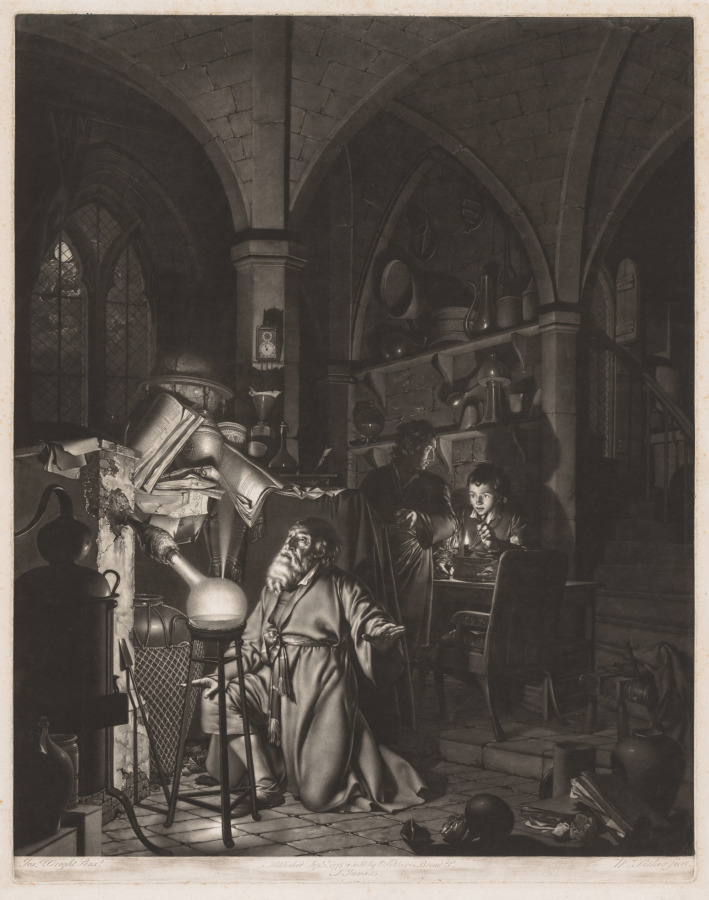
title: The Alchymist, in Search of the Philosopher's Stone, Discovers Phosphorus, and Prays for the Successful Conclusion of his Operation, as was the Custom of the Ancient Chymical Astrologers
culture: England, 18th century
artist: William Pether (British, c. 1738–1821)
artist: after Joseph Wright of Derby (British, 1734–1797)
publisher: William Pether (British (modern), 1728-1821)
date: 1775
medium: mezzotint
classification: Print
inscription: Lower left, in plate: Josh, Wright Pinxt.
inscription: Lower center, in plate: Published Sepr, 1t, 1775 & sold by WPether in Broad Stt, St James's-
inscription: Lower right, in plate: Wm, Pether fecit.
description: The print’s title and the medieval-looking interior filled with instruments identify the kneeling figure as an alchemist, someone who seeks the philosopher’s stone, a mythic substance that was thought to transform ordinary metals into gold and reverse the aging process. Here, the alchemist’s experiments accidentally lead him to discover the chemical element phosphorus, seen glowing in the flask before him. In choosing this moment of illumination, the artist crafted a potent allegory of the Enlightenment in which the creative force of imagination becomes true knowledge through reason and observation.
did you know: Joseph Wright of Derby’s composition was based on the story of Hennig Brand, the German alchemist who accidentally discovered phosphorus in 1676.